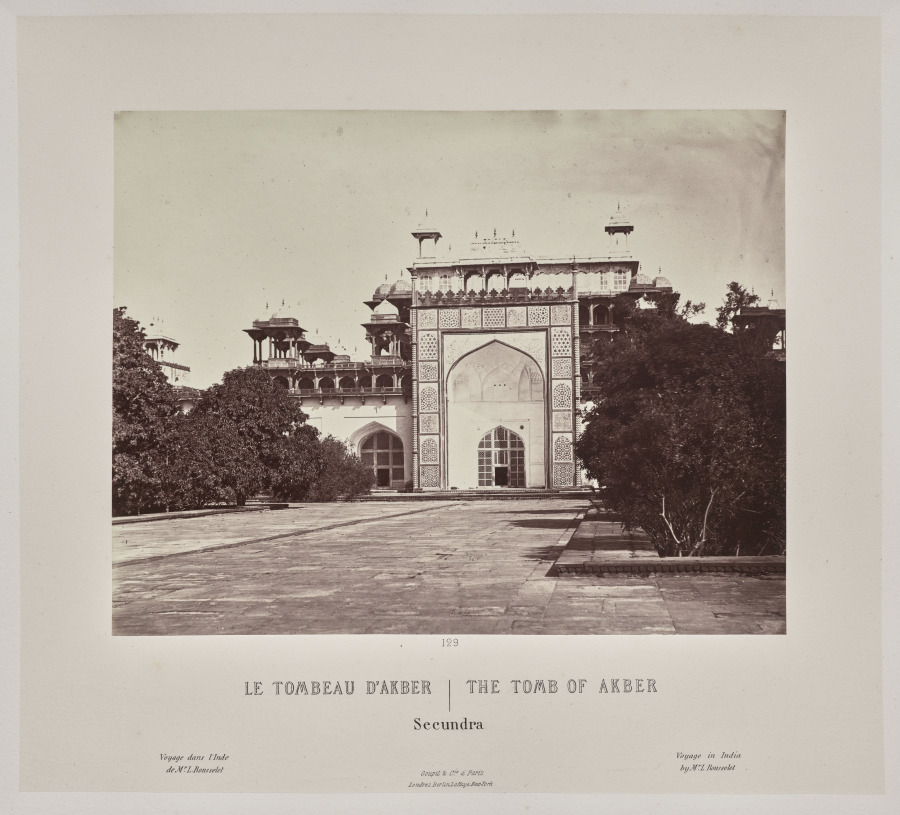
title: The Tomb of Akber, Secundra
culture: France, 19th century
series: India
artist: Louis-Théophile Marie Rousselet (French, 1845–1929)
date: 1865–68, published 1869–70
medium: Albumen print from glass plate negative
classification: Photograph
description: Concerned that his drawings did not do justice to the splendor of India’s monuments, Rousselet learned photography in India that year, a remarkable accomplishment. He proved to be a talented photographer with a sophisticated sense of composition. The scenes in this volume sweep across sites of Sultanate, Rajput, and Mughal power in northern India, from the sacred Hindu city of Varanasi on the Ganges River to Alwar in Rajasthan. Also included are several scenes of industry and portraits of Indian rulers.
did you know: Louis Rousselet described himself as a “scientific traveler” when he went to India alone at age 18 in 1863 and stayed into 1868.